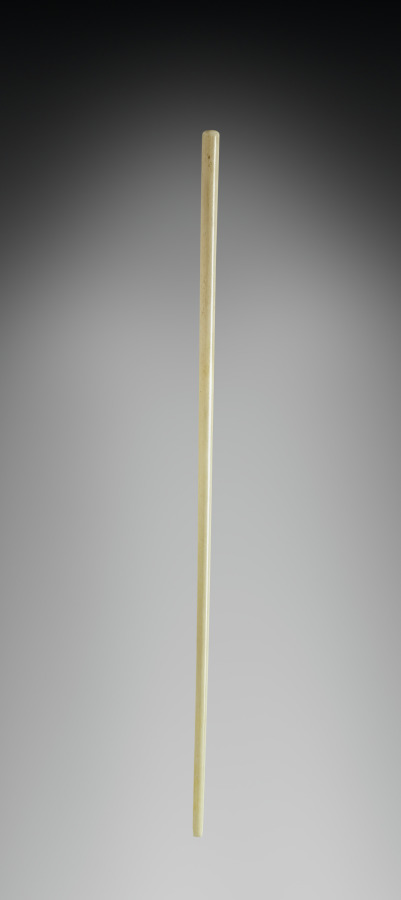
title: Chopstick for Kit with Chopsticks and Knife - Souvenir Trade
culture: Japan, Meiji period (1868–1912) to Taishō period (1912–26)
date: early 1900s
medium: enamel, walrus ivory or bone, wood, metal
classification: Implements